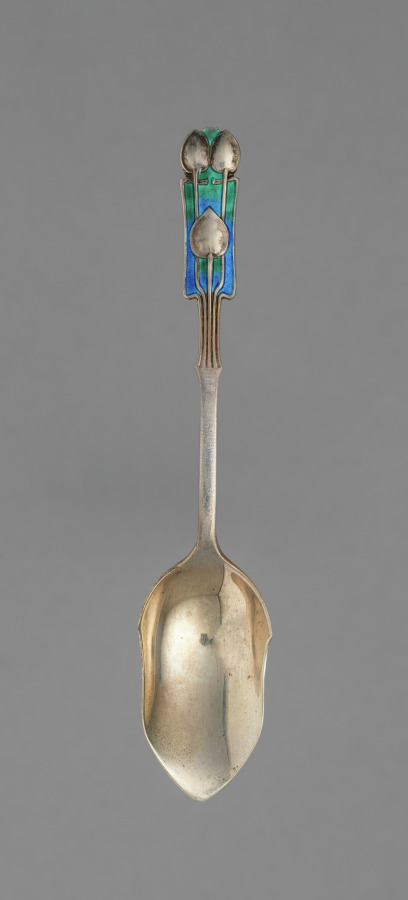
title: Set of six Spoons in Original Box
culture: England, London, 19th century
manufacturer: Liberty and Company (British)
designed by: attributed to Archibald Knox (British, 1864–1933)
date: c. 1895–1910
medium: Silver, enamel decoration and leather box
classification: Silver